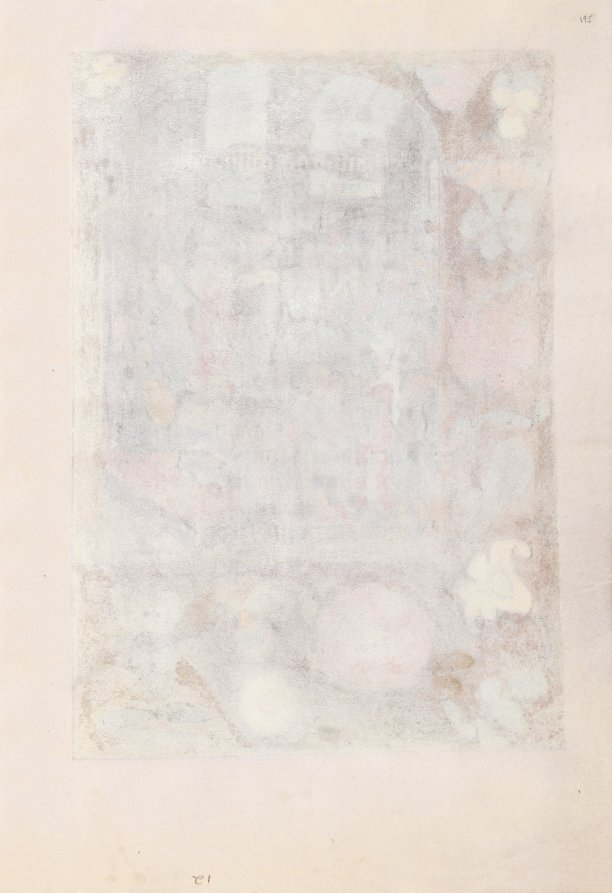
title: Hours of Queen Isabella the Catholic, Queen of Spain: Fol. 195r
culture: Flanders, Ghent and Bruges, late 15th century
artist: Master of the First Prayerbook of Maximillian (Flemish, c. 1444–1519)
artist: and Associates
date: c. 1500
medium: ink, tempera, and gold on vellum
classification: Bound Volume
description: This manuscript was illuminated by a circle of at least five highly organized manuscript painters active in the Flemish cities of Ghent and Bruges. The principal illuminator was Alexander Bening, who painted the majority of the book's miniatures. Manuscripts produced by this circle of artists are renowned for the decoration of their borders, which typically feature a rich variety of realistically-painted flowers, birds, and butterflies. This prayer book, called a book of hours, was intended not for a cleric, but for the private devotions of a lay person-in this case, Isabella the Catholic, Queen of Spain (1451-1504). Isabella's coat of arms embellishes the book's frontispiece. It is unlikely that the book was commissioned by the Queen herself; rather, she probably received it as a diplomatic gift from someone courting her patronage, perhaps Cardinal Francisco Jimenez de Cisneros. A Franciscan friar, Jimenez was dependent upon Isabella for his advancement, first to the post of Queen's confessor in 1492, and then to Archbishop of Toledo in 1495.